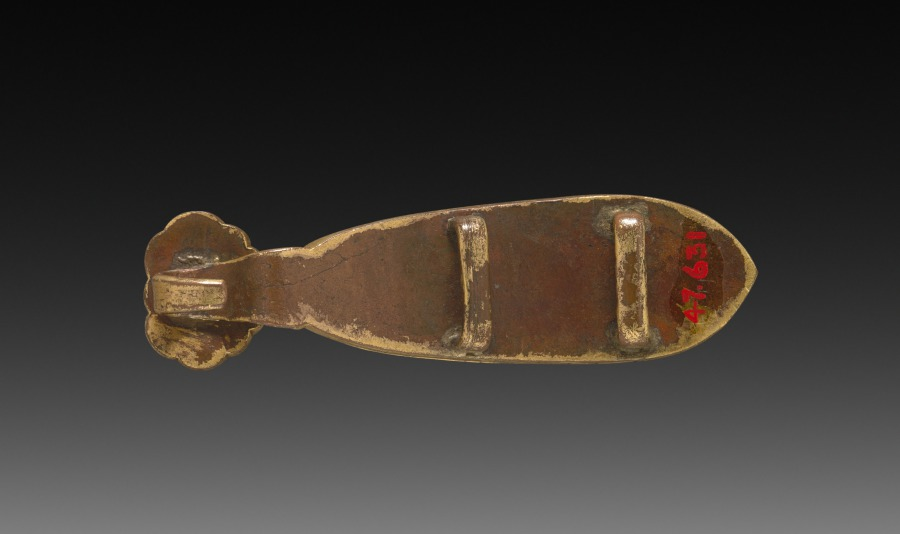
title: Buckle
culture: China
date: 1900s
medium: gilt brass, engraved and set with semiprecious stones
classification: Jewelry